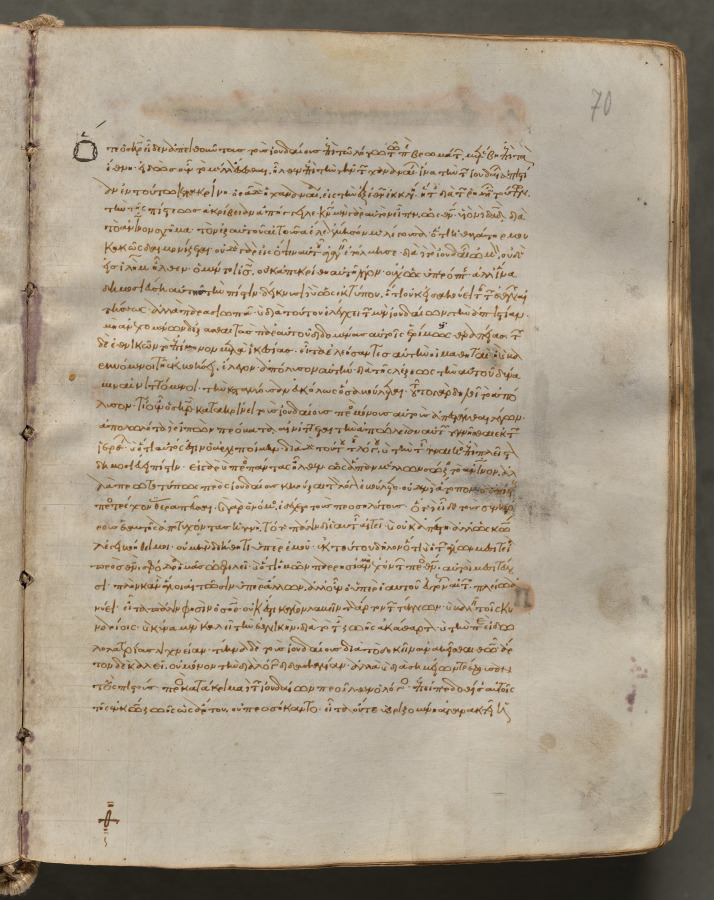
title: Text, folio 70 (recto), from a Gospel Book with Commentaries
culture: Byzantium, Constantinople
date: c. 1000–1100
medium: ink, tempera, and gold on vellum; leather binding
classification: Bound Volume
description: Each of the four gospels in this book opens on a page with brilliantly illuminated borders depicting the author of the text as well as birds-principally peacocks, symbols of the immortality of the soul-and fountains, representing the fountain of life and the salvation of the soul. This volume consists of 428 leaves with texts in Greek. Its level of sophistication suggests that it was probably written and decorated in a monastery in Constantinople.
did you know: Gospel Books were carried in procession through Byzantine churches.